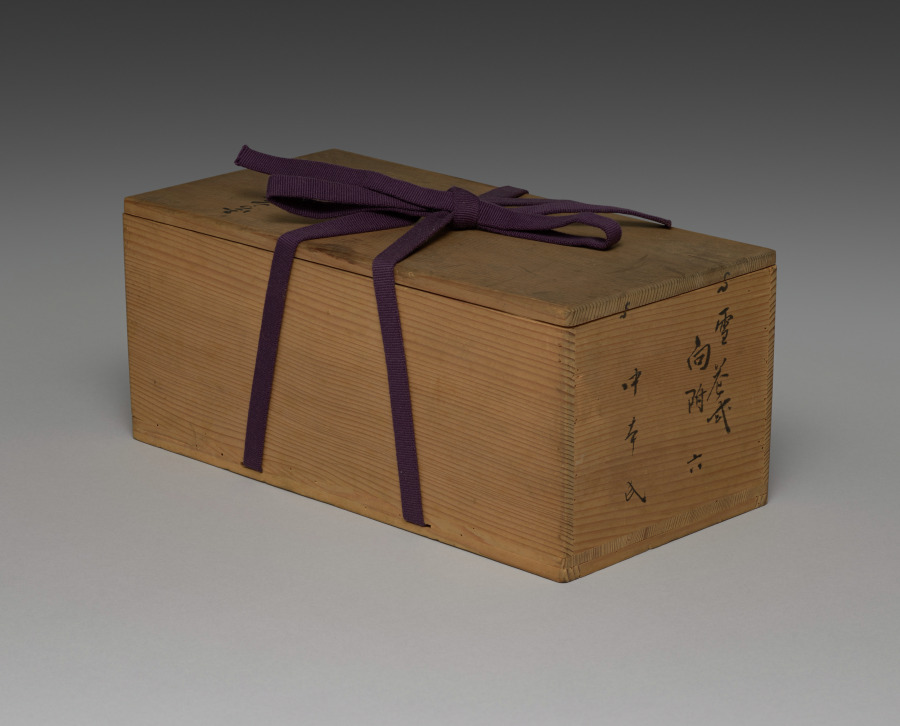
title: Snow-Flake Side Dishes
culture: Japan, Meiji period (1868–1912)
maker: Seifū Yohei III (Japanese, 1851–1914)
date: 1893–1914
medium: Set of six dishes; porcelain with lobed rims and pink glaze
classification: Ceramic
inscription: 清風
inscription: 帝室技芸員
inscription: 清風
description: According to the box lid, this set of 6 side dishes, or mukōzuke, are “snow-flower style” (sekkashiki), having mouths shaped like snowflakes. Their mouths, which have 6 lobes and scalloped edges, are traced with brown iron oxide at the rim. The outside of each bowl is glazed with a very bright pink over the basin and foot, and the inside is left white. From directly above, one sees a snowflake-like shape, and from the side, they seem to float above a rosy ground.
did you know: The box for this set of dishes has an inscription on the side noting that they were for a person with the family name Nakamoto.